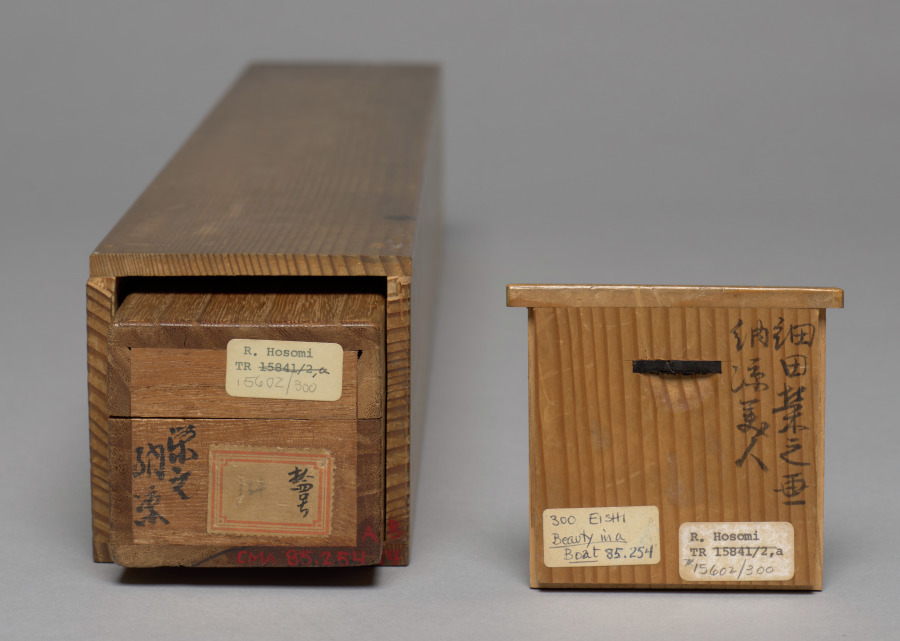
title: Beauty in a Boat on Sumida River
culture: Japan, Edo period (1615–1868)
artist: Chōbunsai Eishi (Japanese, 1756–1829)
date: c. 1801–4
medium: hanging scroll; ink and color on silk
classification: Painting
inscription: artist's signature 栄之筆 and seal, lower right.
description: The Sumida River was a popular refuge from the heat and humidity of the city during the summer. One can see the torii gate of Mimeguri Shrine just to the left of the woman's fan.